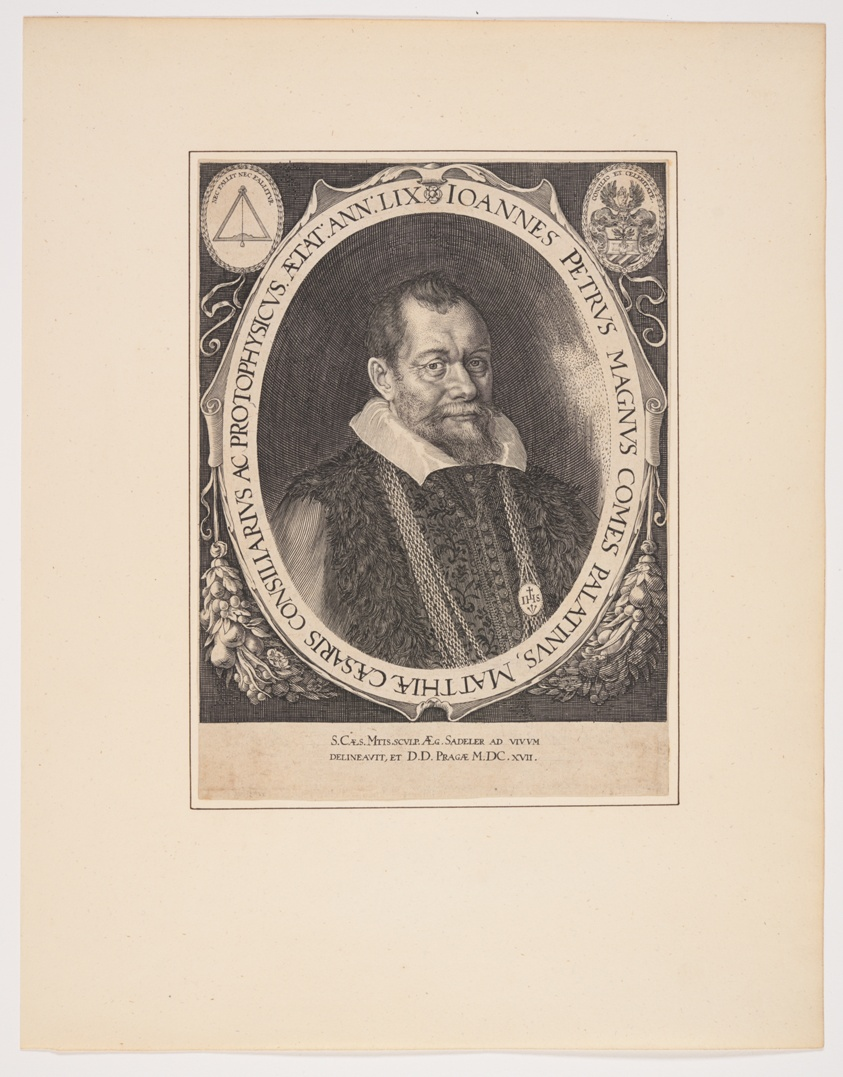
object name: Print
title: Johann Peter Magnus, Physician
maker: Aegidius Sadeler II; Flemish, c. 1570–1629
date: 1617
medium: Engraving on paper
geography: Flanders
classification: engraving; paper; print; prints and drawing